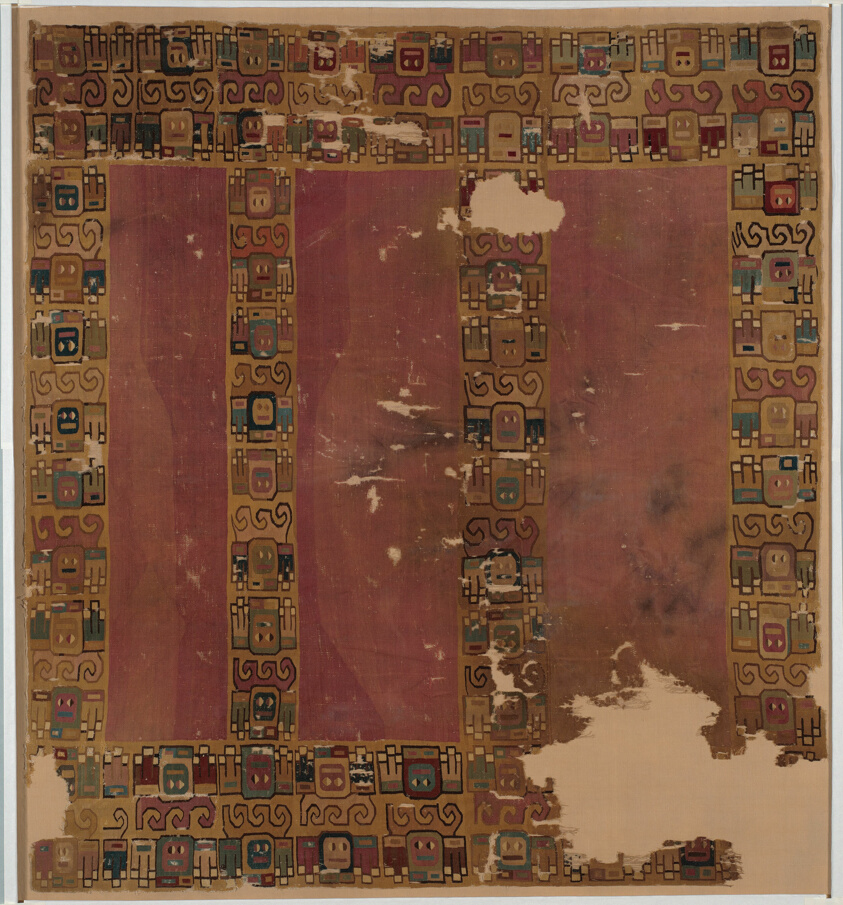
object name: Costume and Accessories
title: Tunic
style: nazca, early intermediate period, Pre-Columbian, americas, huari, andean, andes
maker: Possibly Huari or Late Nazca; Possibly central highlands or south coast, Peru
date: A.D. 600/800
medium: Cotton and wool (camelid), single interlocking tapestry weave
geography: Peru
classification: textile; weaving; costume